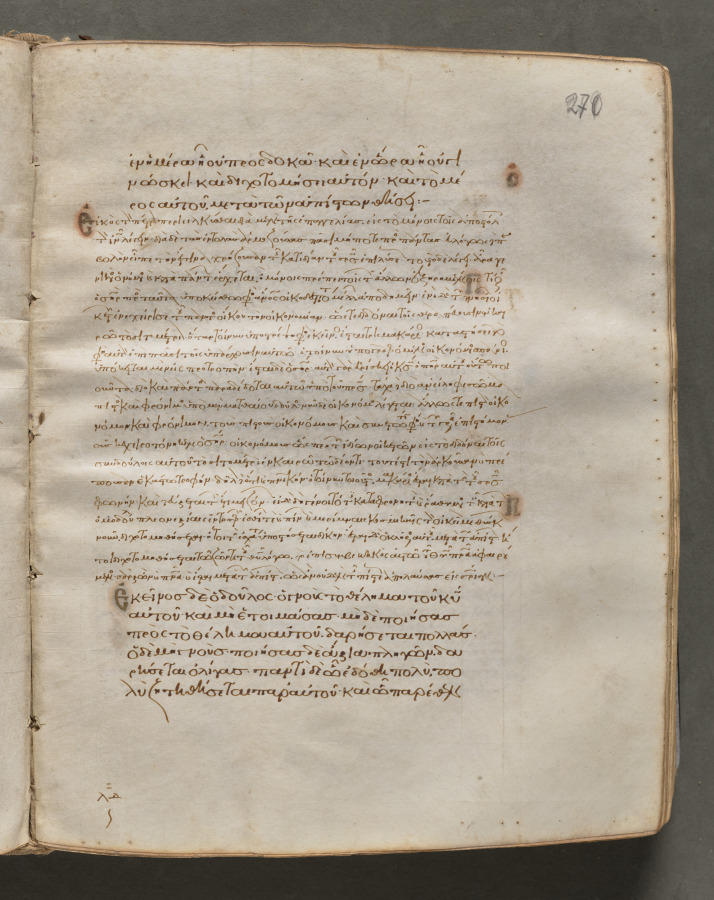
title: Text, folio 270 (recto), from a Gospel Book with Commentaries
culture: Byzantium, Constantinople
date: c. 1000–1100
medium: ink, tempera, and gold on vellum; leather binding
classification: Bound Volume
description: Each of the four gospels in this book opens on a page with brilliantly illuminated borders depicting the author of the text as well as birds—principally peacocks, symbols of the immortality of the soul—and fountains, representing the fountain of life and the salvation of the soul. This volume consists of 428 leaves with texts in Greek. Its level of sophistication suggests that it was probably written and decorated in a monastery in Constantinople.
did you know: Gospel books were carried in procession through Byzantine churches.